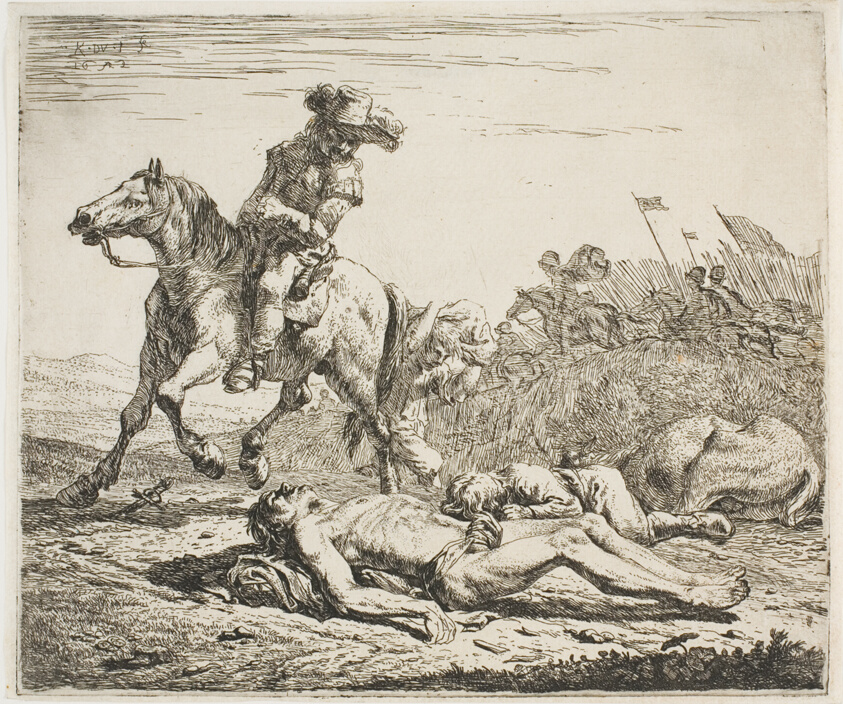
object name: Print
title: The Battlefield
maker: Karel Dujardin (Dutch, c. 1622-1678)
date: 1652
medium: Etching on paper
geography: Holland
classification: etching; print; prints and drawing